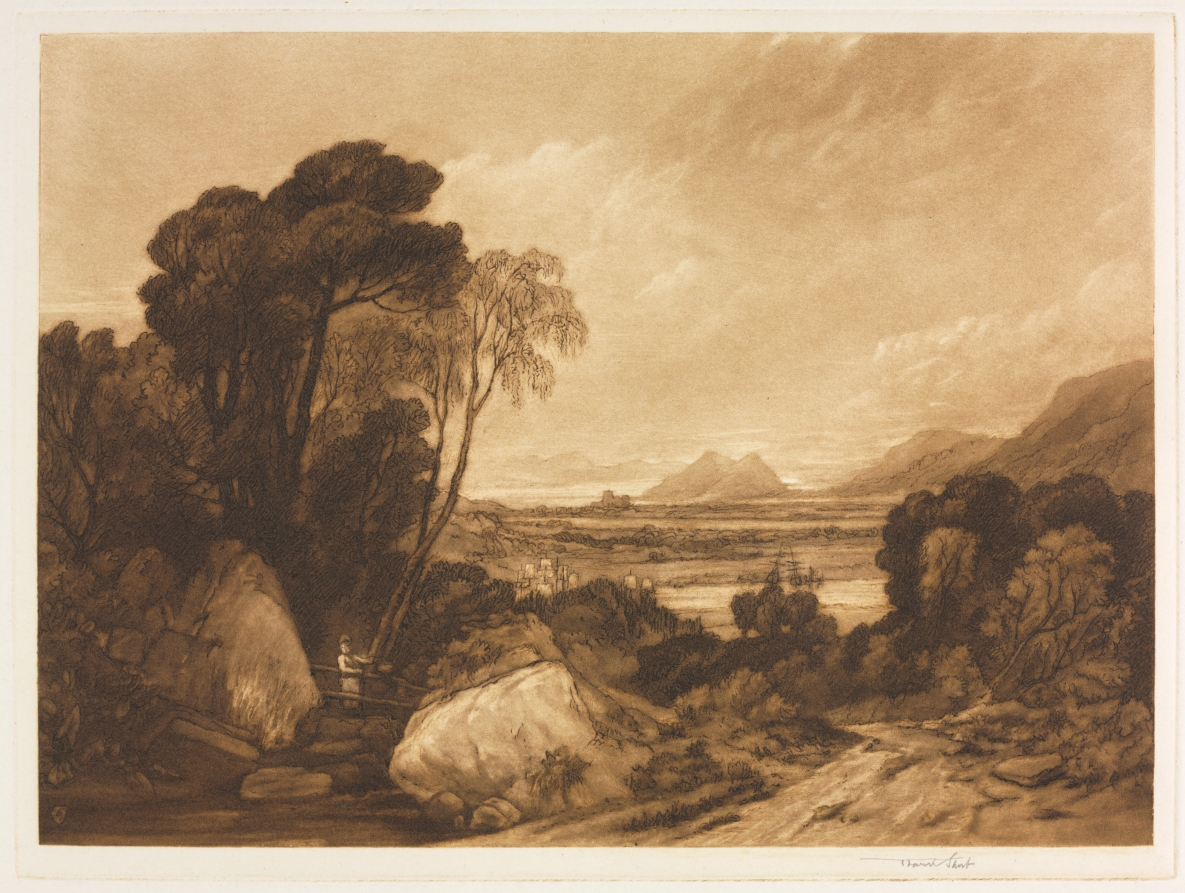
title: The Mildmay Sea-Piece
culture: England, 19th century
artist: Frank Short (British, 1857–1945)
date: 1886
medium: etching and mezzotint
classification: Print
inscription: Lower right, in pencil: "Frank Short" lower left, in pencil: "H20 The Mildmay Seapiece - Sunset on Beach"